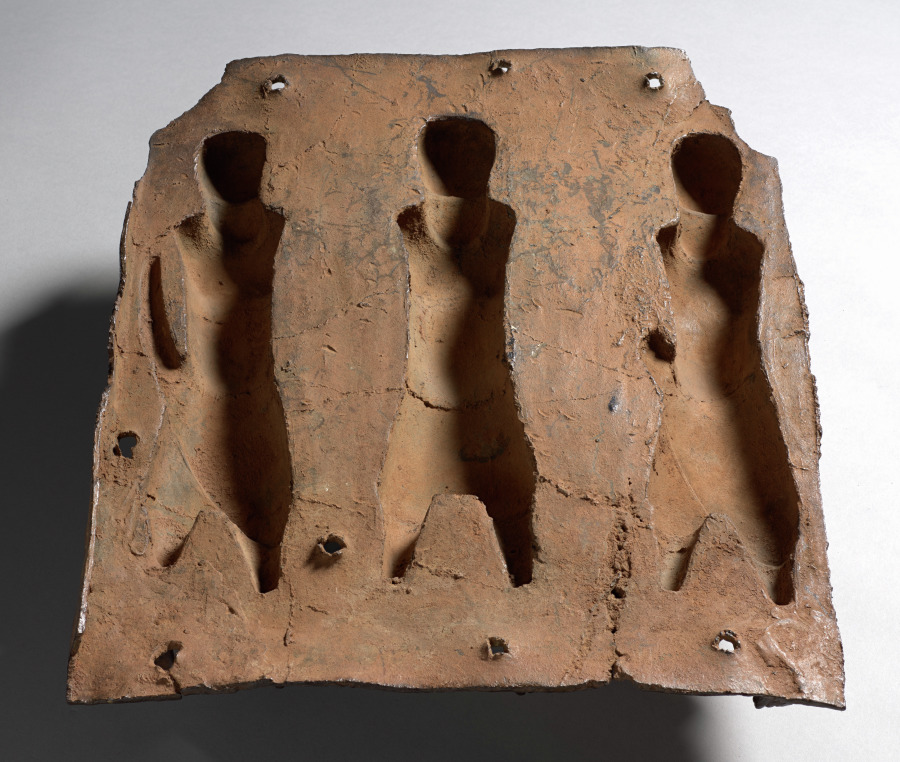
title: Plaque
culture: Nigeria, Benin Kingdom, Ẹdo peoples, members of the Igun Eronmwon (royal brasscasters) guild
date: 1500s–1600s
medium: Copper alloy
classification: Sculpture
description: Nearly 900 metal plaques once adorned the Ọba’s palace courtyard, documenting Benin’s history and customs. This one depicts two male attendants (enobore) supporting an Ọba. It uses hierarchical composition: important figures are large and centered. Everything about the Ọba is greater than his companions: their bodies, clothing, and jewelry. The flanking attendants physically support a man weighed down by heavy royal garments and responsibilities. Brasscasters skillfully cast their clasping hands projecting from the plaque. The bottom left number means the British Museum formerly owned this. It entered their collection in 1898, one year after British troops took it from a palace storeroom during the Siege of Benin.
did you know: Look at the side of this plaque. The designs on the slender edges are considered visual "signatures" of the different casters who made plaques for the Oba of Benin.